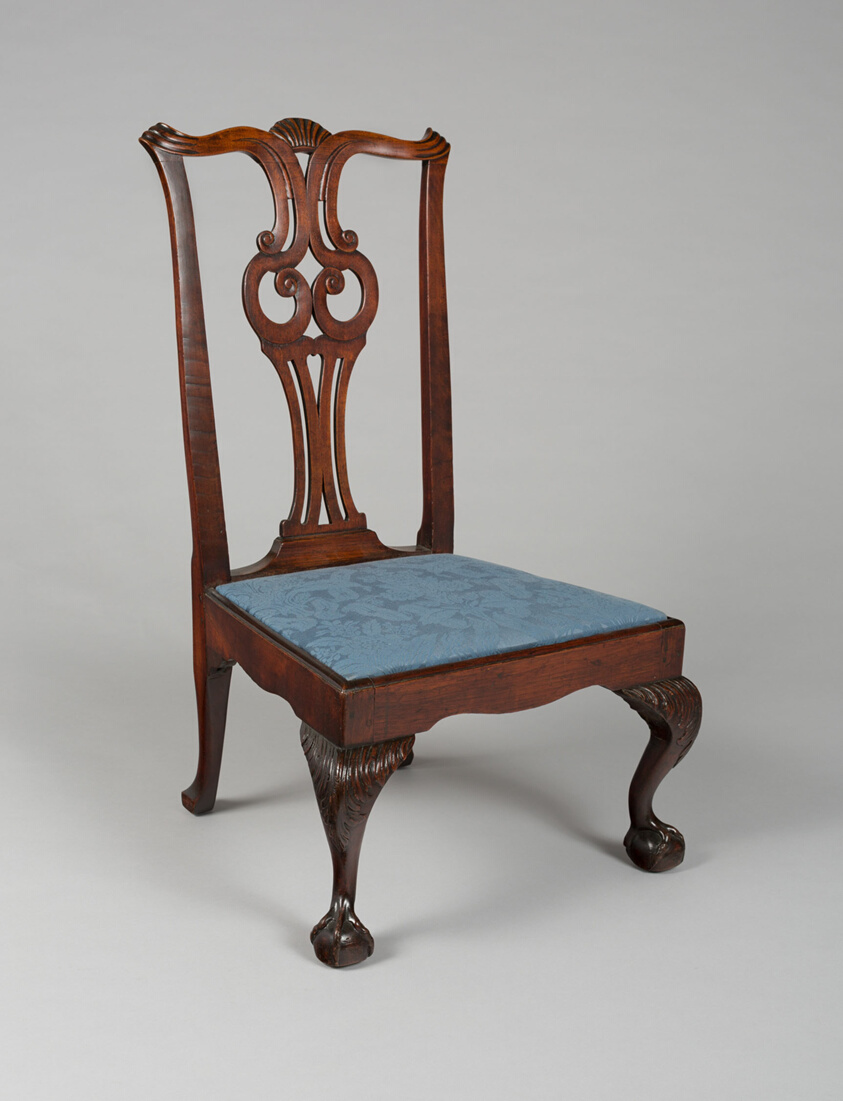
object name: Furniture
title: Side Chair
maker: Artist unknown (American, 18th century); Northeastern Massachusetts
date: 1755–90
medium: Mahogany, white pine, and upholstery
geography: Northeastern Massachusetts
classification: seating; furniture; american decorative arts; american arts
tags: furniture